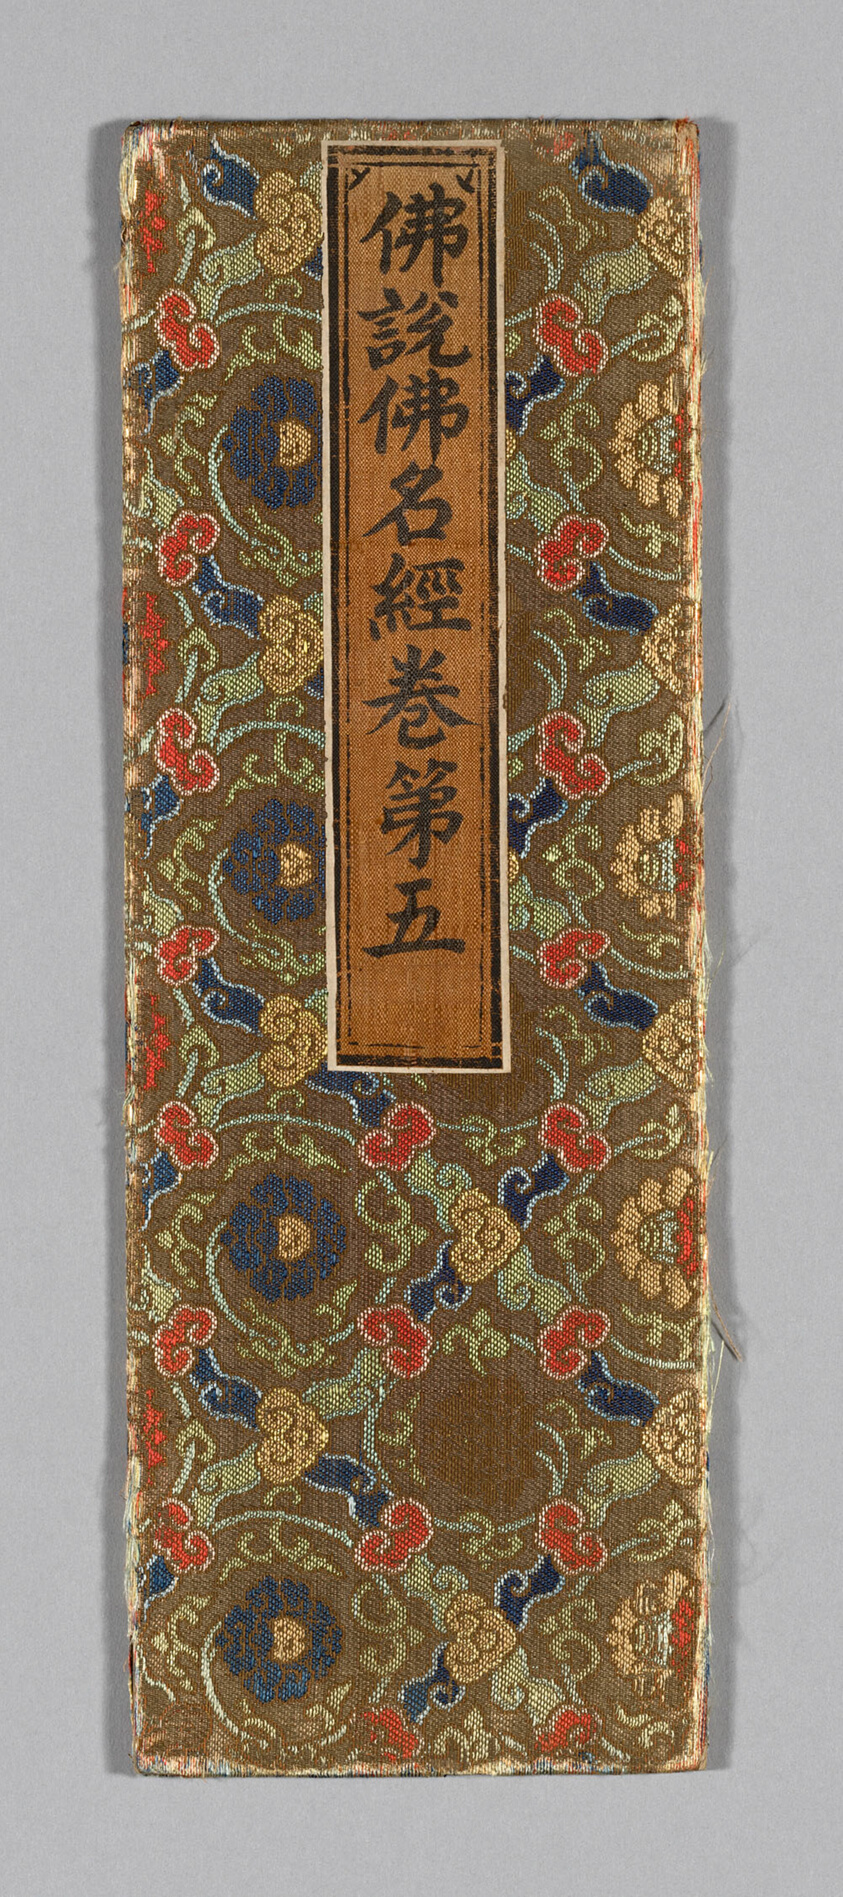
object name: Textile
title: Sutra Cover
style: ming, Chinese (culture or style), East Asian, asian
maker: China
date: Ming dynasty (1368–1644), c. 1590s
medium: Silk and gold-leaf-over-lacquered-paper strips, twill weave with twill interlacings of secondary binding warps and patterning wefts, wrapped over cardboard; applied label of silk, plain weave; with inscribed title painted and/or printed with ink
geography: China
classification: textile; weaving